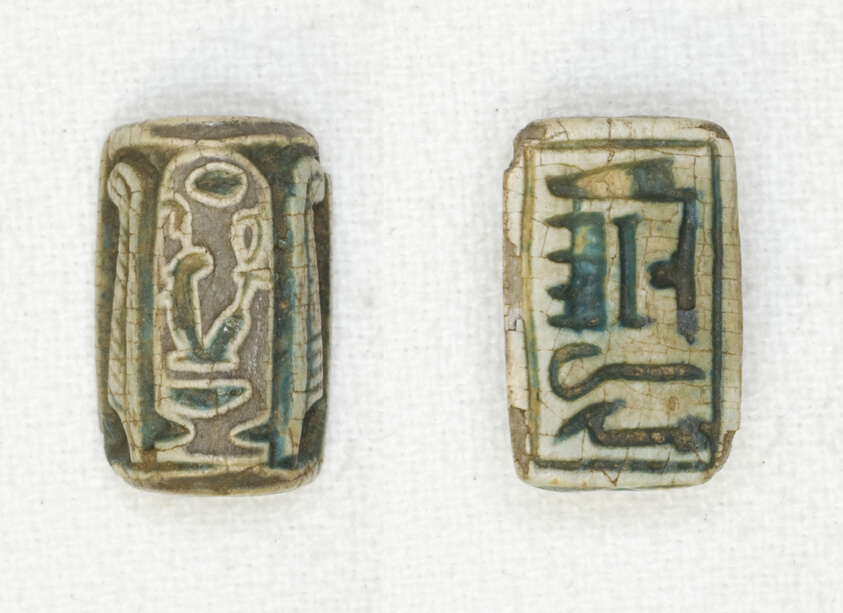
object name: Costume and Accessories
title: Plaque: Nebmaatre/Amenhotep Ruler of Thebes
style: new kingdom, eighteenth dynasty, egyptian, ancient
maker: Egyptian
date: New Kingdom, Dynasty 18, reign of Amenhotep III (about 1390–1352 BCE)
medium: Glazed steatite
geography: Egypt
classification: plaque (flat object); ancient art; costume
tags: Hieroglyphs, king, kings, pharaohs